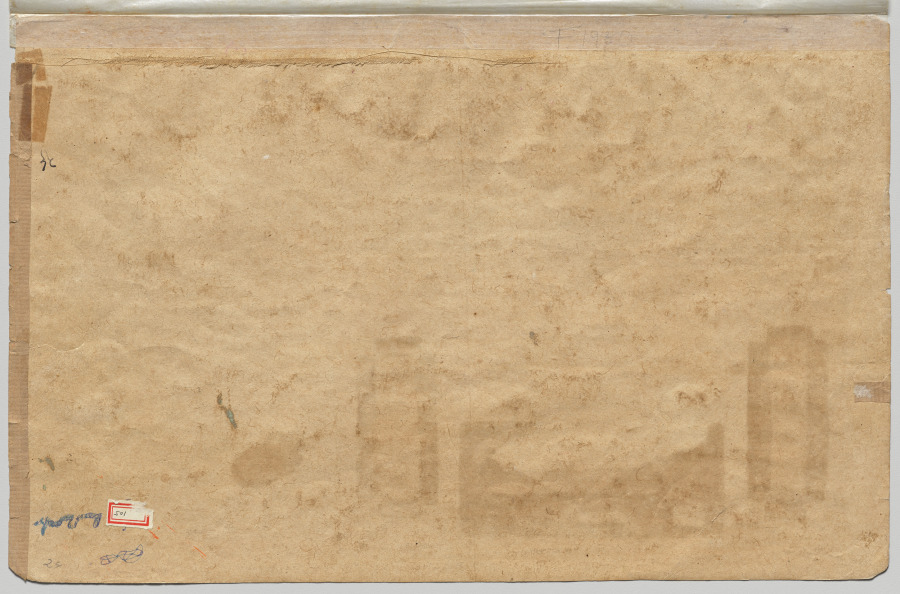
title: Prince Shreyamsa dreams of the coming of Rishabha, from a Panchakalyanaka (Five Auspicious Events)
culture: Northwestern India, Rajasthan, Rajput Kingdom of Amber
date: 1670–80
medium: Gum tempera, ink, silver, and gold on paper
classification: Painting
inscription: [[recto, devanagari inscription over the sleeping prince]] śreyaṁsakāsupanā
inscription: [[verso, upper left margin]] 25.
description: Dreams foretell important events in Indian literature. In this painting a prince lies half asleep and experiences eight visions, pictured above the reclining figure. At the right, the prince on the throne with the royal umbrella seeks help interpreting the dreams. They predicted the coming of Rishabha, the first Jina, who has been fasting for a full year. The prince then became the first person in the world to give proper alms, or pious offerings, to a Jina. This painting is from a group that is recognized as the first Jain manuscript made in the form of a pictorial series, rather than a handwritten manuscript.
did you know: This painting is from the earliest known Jain series made in a Mughal-inspired style.